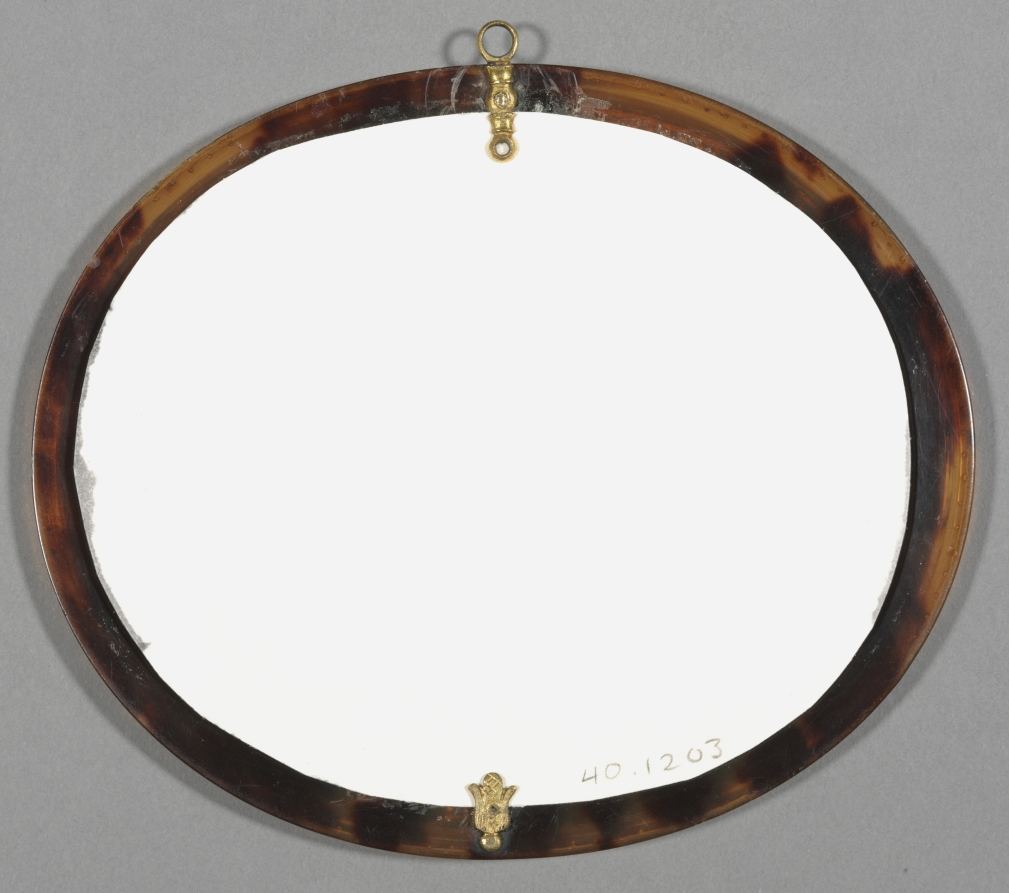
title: A Woman Putting Flowers in Her Hair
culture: Italy, 18th century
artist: Rosalba Carriera (Italian, 1675–1757)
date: c. 1710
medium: watercolor on ivory in a tortoiseshell pique-point frame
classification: Portrait Miniature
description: Scholars generally agree that Rosalba Carriera (1675-1757) developed the art of painting miniatures on ivory, in place of the traditional support of vellum, a fine animal skin. Although she became famous as a pastel painter, in her early career, Carriera decorated ivory snuff boxes-containers used to hold powdered tobacco taken by sniffing up the nostrils-for tourists. This miniature likely served as a lid to a snuff box, due to its elliptical shape in contrast to the oval or occasionally round shapes of most other miniatures. Although painters of ivory snuff boxes used watercolor, the same media artists used on vellum, the finished images on ivory were crude in comparison to those painted on vellum because ivory presents a greasy, non-absorbent surface, causing watercolor to run. Carriera revolutionized the art of watercolor painting on ivory through a process she termed her fondelli, or foundation. She developed a way in which to work in watercolor on ivory that emulated the soft powdery sophistication of her pastels. She used opaque gouache, essentially watercolor paint mixed with a gummy white, a combination of media which adhered to the oily surface of ivory. News of Carriera's innovation spread through Europe, and in the first few decades of the 1700s, most miniaturists abandoned vellum in favor of ivory.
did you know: Its extraordinary thickness indicates that this is one of Carriera's earliest experiments painting on ivory.